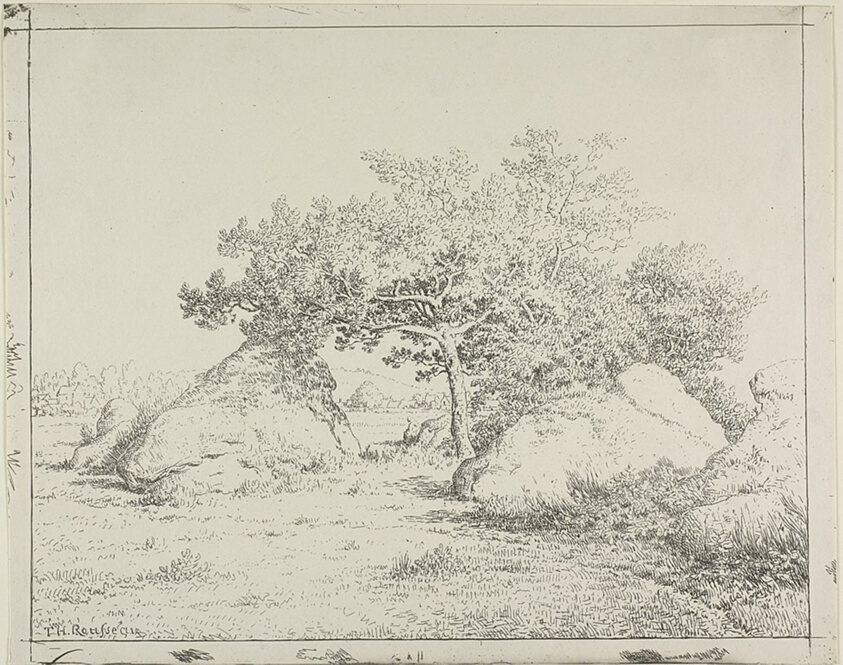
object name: Print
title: Cherry Tree at Plante à Biau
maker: Théodore Rousseau (French, 1812-1867)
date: 1862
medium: Cliché-verre on ivory wove paper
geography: France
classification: cliché-verre; print; prints and drawing